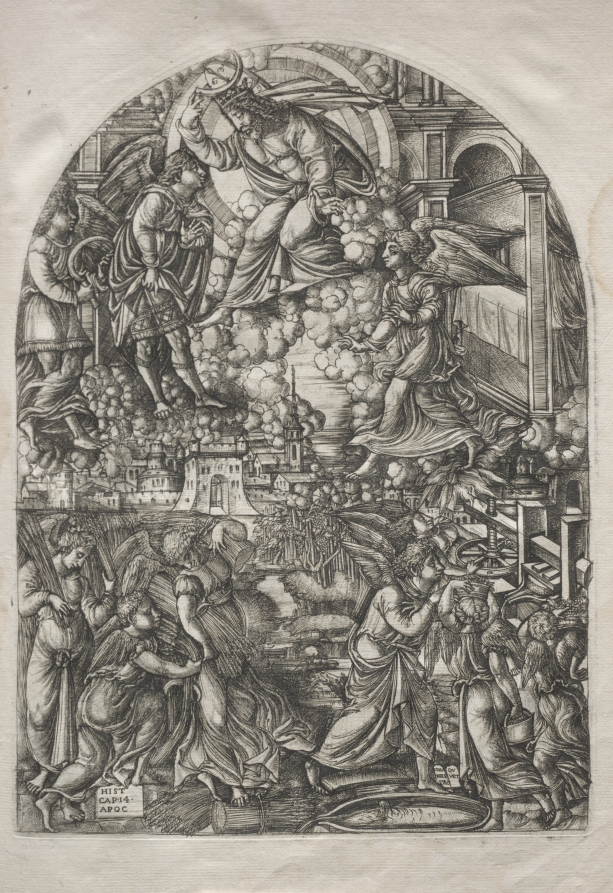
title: The Apocalypse: The Winepress of the Wrath of God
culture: France, 16th century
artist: Jean Duvet (French, 1485–1561)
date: 1546–1556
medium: engraving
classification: Print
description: This print is part of a bound volume of works illustrating the a narrative of the Apocalypse, taken from the Revelation of Saint John in the Bible. The 23 engravings in the series occupied the artist for a number of years and represent his greatest artistic achievement. The museum's volume is one of only seven known complete sets. Jean Duvet was one of the first major printmakers in France and one of the most original artists of the 1500s. Although he worked mostly in the provincial city of Langres, he became aware of Italian art through the circulation of prints—notably those of Marcantonio Raimondi. His solidly modeled human figures reflect the influence of the Italian High Renaissance. Duvet, however, developed an idiosyncratic, highly artificial style with crowded compositions that ignore rational space in favor of ornamental surface patterns.